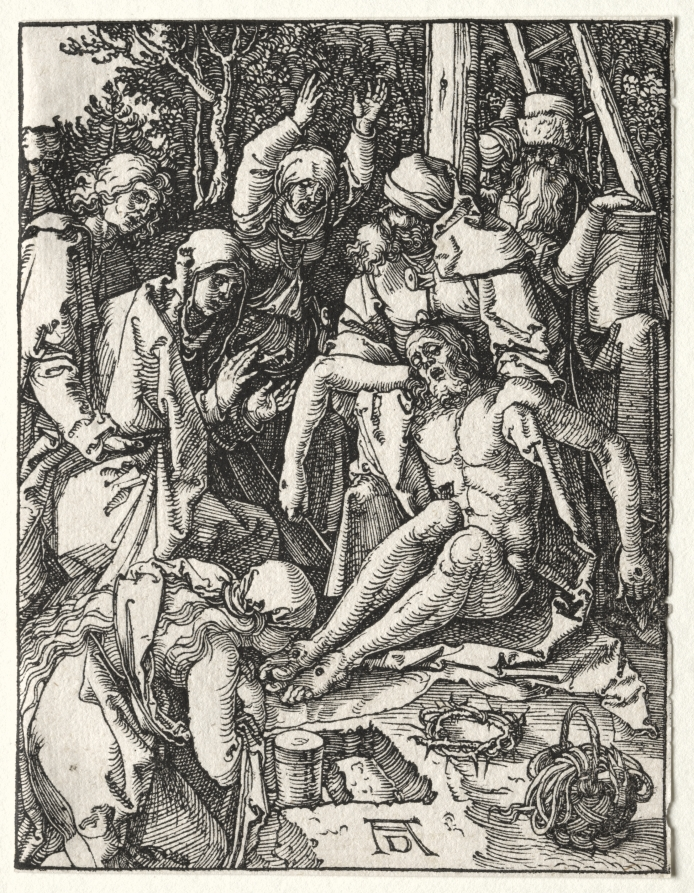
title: The Small Passion: Lamentation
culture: Germany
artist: Albrecht Dürer (German, 1471–1528)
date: c. 1509–1510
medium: woodcut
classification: Print